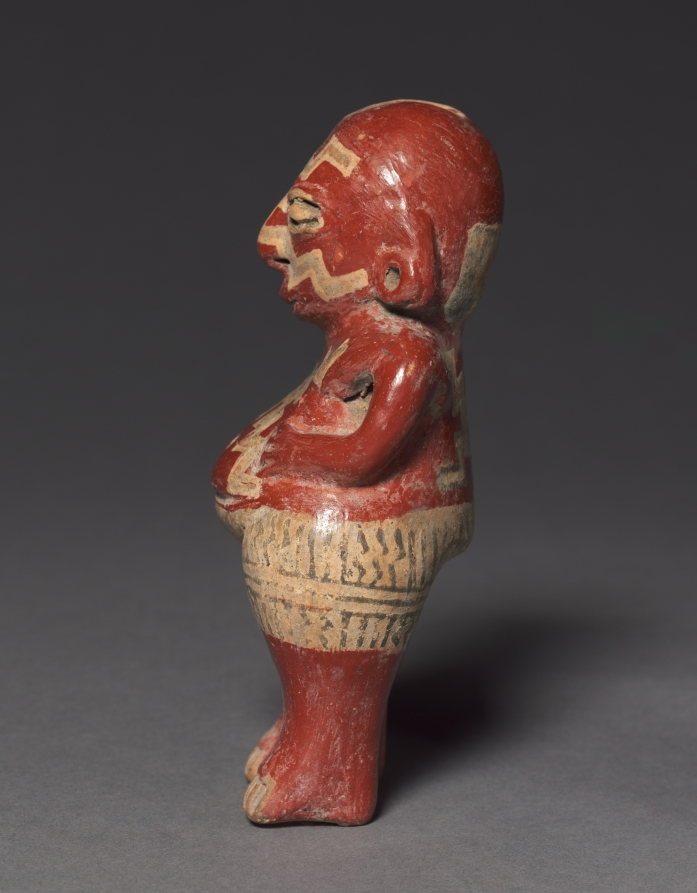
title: Geometrically Patterned Female Figure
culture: Mesoamerica, Guanajuato or Michoacán, Chupícuaro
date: 400–100 BCE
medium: Ceramic, slip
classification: Sculpture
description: Artists of the Chupícuaro culture, based to the north of modern-day Mexico City, may be best known for hollow ceramic figurines like this one. Always female and often apparently pregnant, such figurines commonly are painted with stepped geometric motifs in vibrant, highly burnished slips (creamy mixtures of water and crushed minerals). The meanings of the motifs and the figurines themselves are poorly understood.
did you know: This figure was formed in two halves that were hollowed out and joined at the hips.